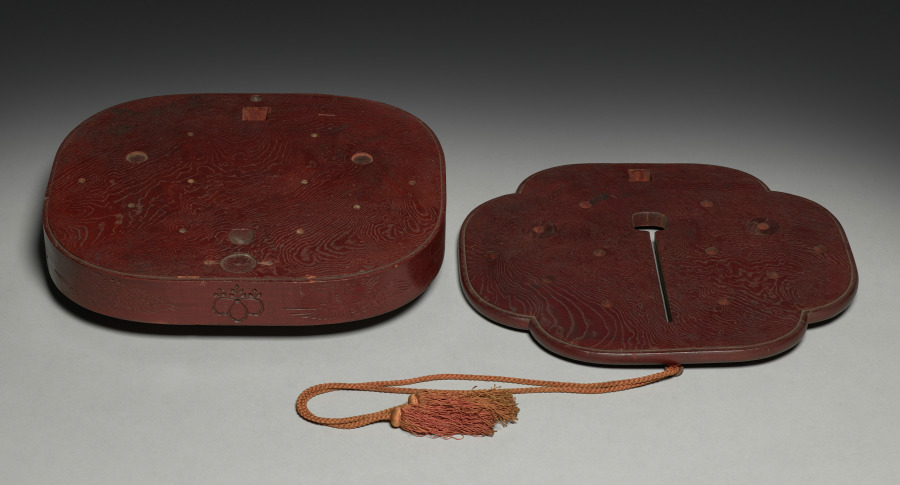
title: Stand for Arrows and Bow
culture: Japan, Edo period (1615–1868) to Meiji period (1868–1912)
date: 1800s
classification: Wood